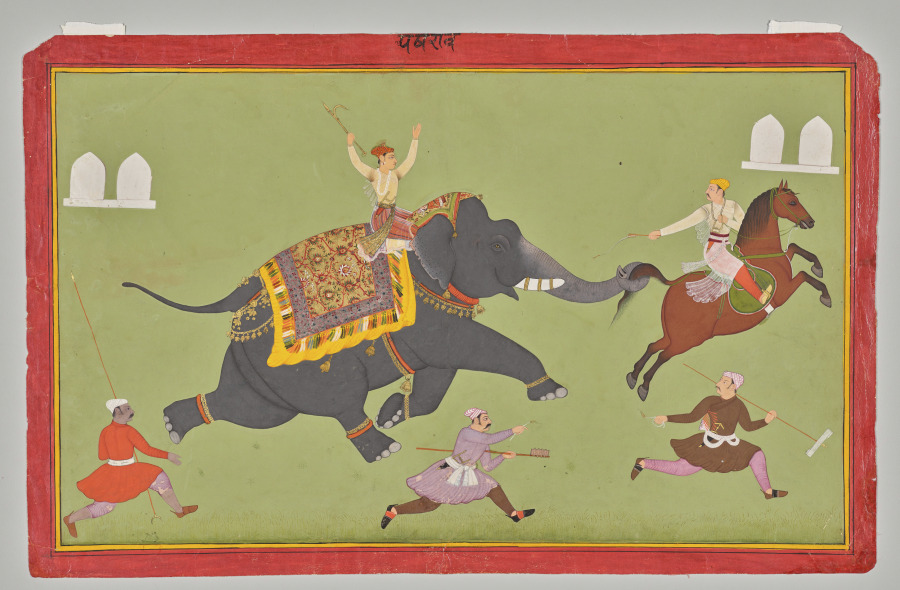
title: The Elephant of Maharana Jai Singh of Mewar (r. 1680–98) Catches a Horse by the Tail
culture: Northwestern India, Rajasthan, Rajput Kingdom of Mewar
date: c. 1680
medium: Gum tempera, ink, and gold on paper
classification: Painting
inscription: [[recto, upper center]] pakharāva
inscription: [[verso, center]] Māhārāṇājī śrī jaisīghjī rī vār ro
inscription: [[verso]] 253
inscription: [[verso]] Narṃ kī:7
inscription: [[verso, in red]] 13/253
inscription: [[verso, upper left corner]] nāṃ 2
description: The elephant driver holds his hands and the goad helplessly up in the air as the frenzied royal elephant grabs the tail of a galloping horse with its trunk. The horse rider turns around in astonishment and tries to whip the elephant’s trunk. A group of royal servants run erratically and try to contain the elephant.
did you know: The servant dressed in mauve jama (belted tunic) attempts to light a firecracker to frighten the elephant.